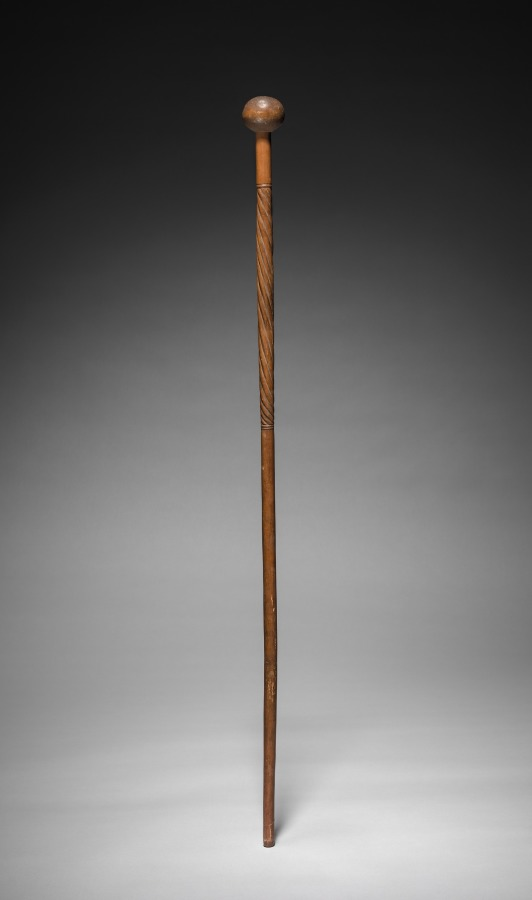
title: Baton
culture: Africa, unknown maker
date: c. 1875–1925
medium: wood, ivory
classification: Implements